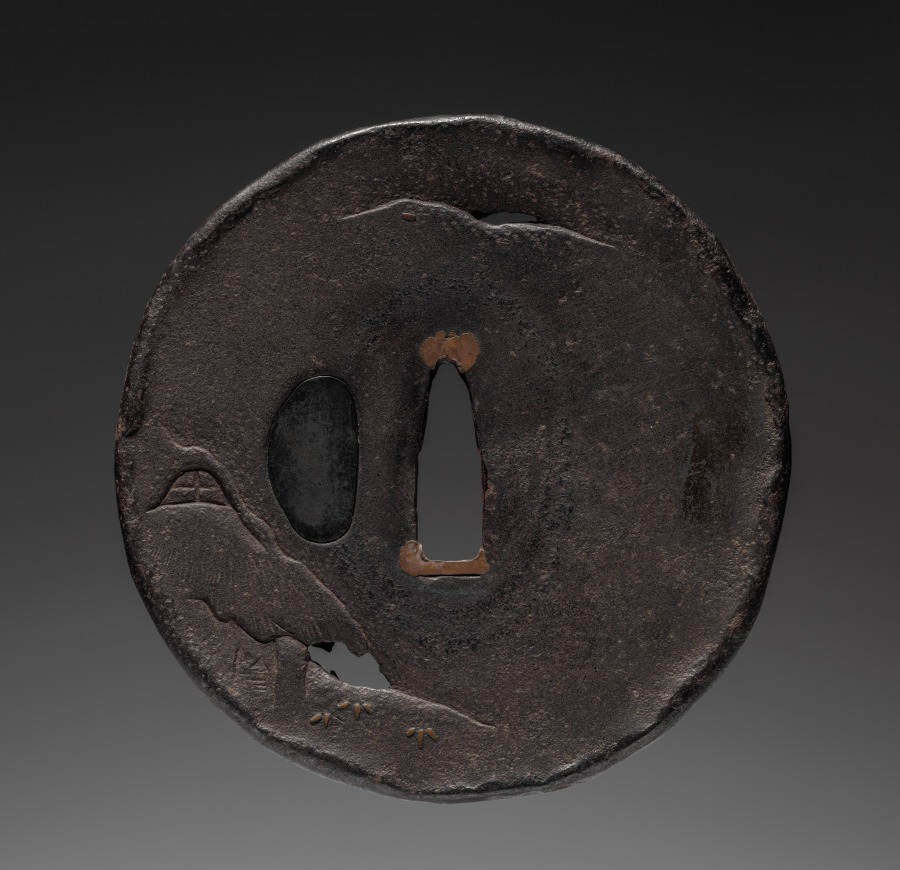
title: Sword Guard (Tsuba) with House and Rice Harvest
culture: Japan, possibly Edo period (1615-1868)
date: c. 1615–1868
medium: iron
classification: Arms and Armor